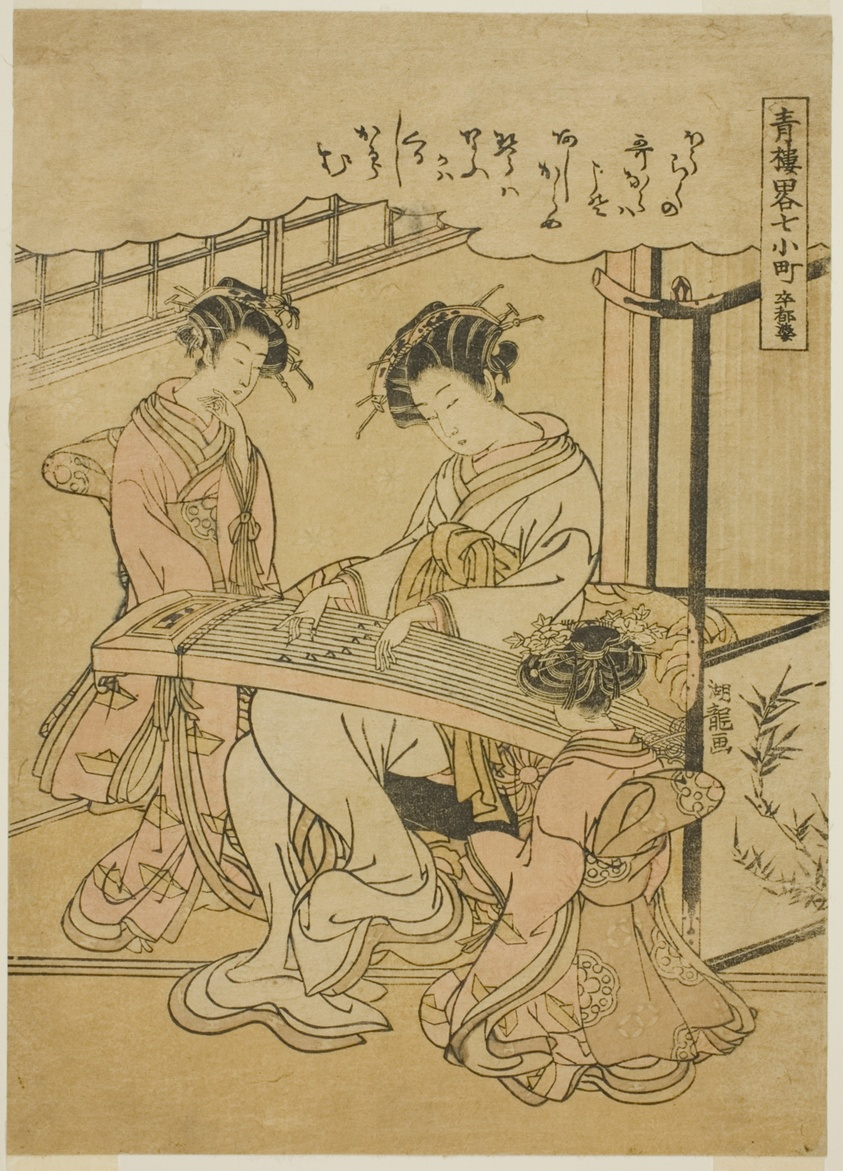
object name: Print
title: Komachi and the Stupa (Sotoba Komachi), from the series "Informal Parodies of the Seven Komachi in the Pleasure Quarters (Seiro ryaku nana Komachi)"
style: Japanese (culture or style)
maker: Isoda Koryusai (Japanese, 1735-1790)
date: c. 1776/81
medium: Color woodblock print; chuban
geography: Japan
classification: woodblock print; print; asian art